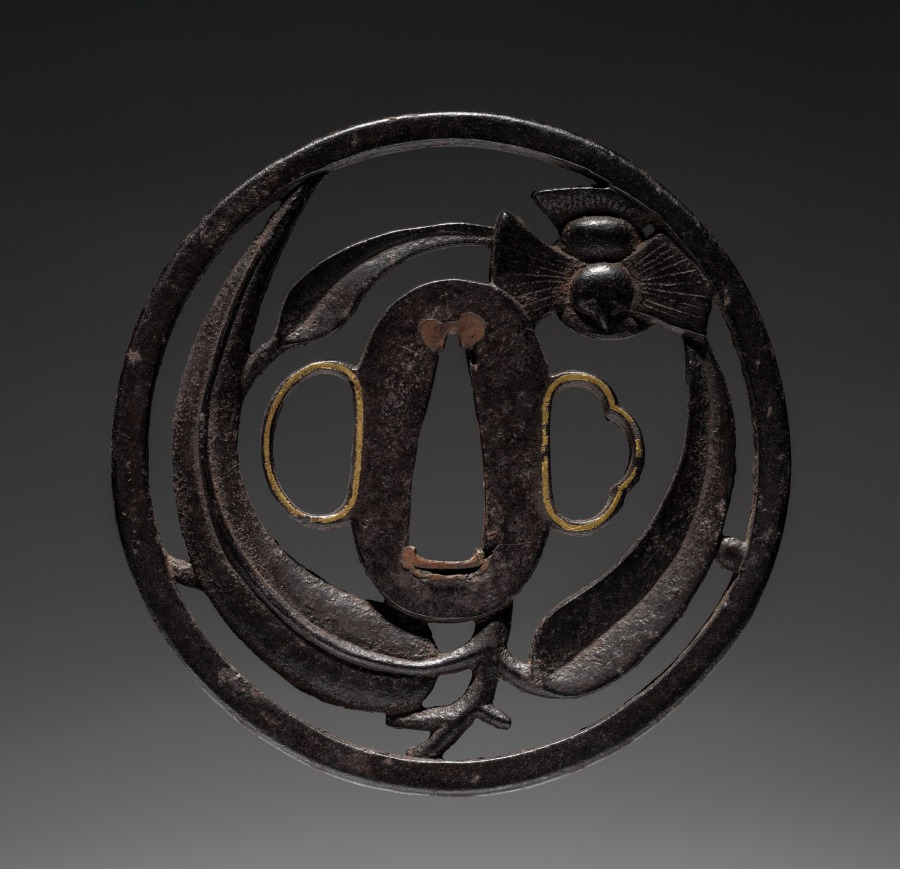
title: Sword Guard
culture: Japan, Edo period (1615–1868)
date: c. 1800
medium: iron (Choshun type)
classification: Arms and Armor